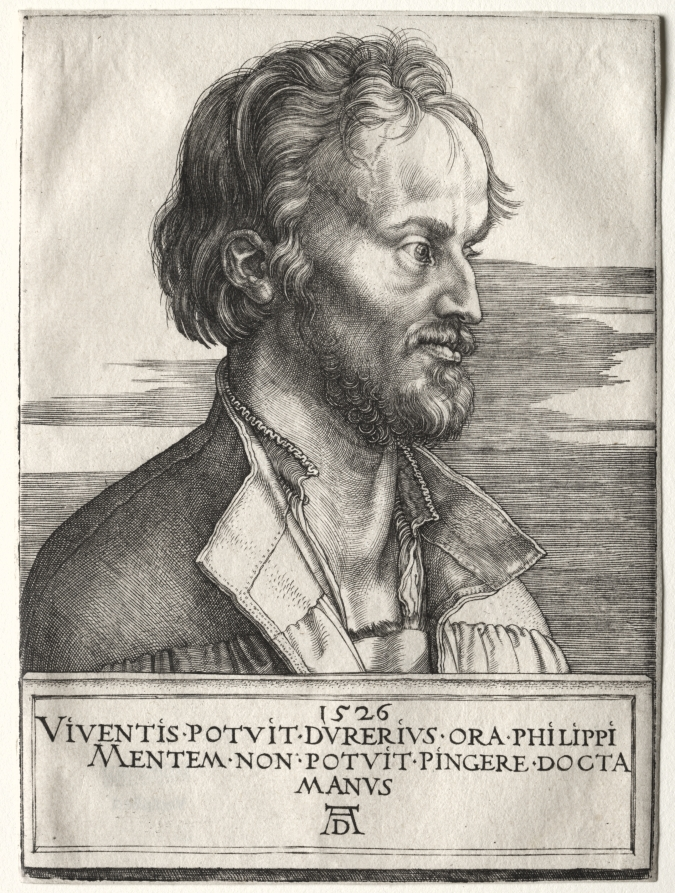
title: Philipp of Melanchthon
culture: Germany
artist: Albrecht Dürer (German, 1471–1528)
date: 1526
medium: engraving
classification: Print